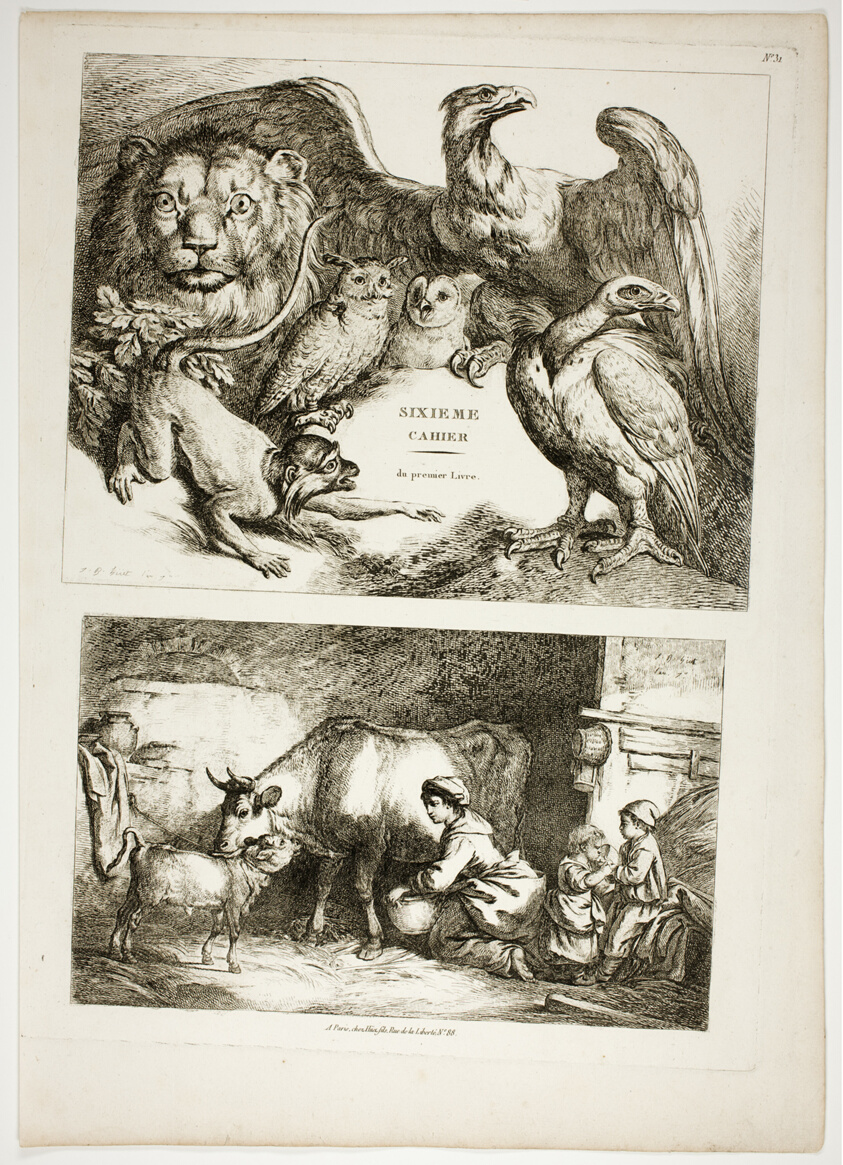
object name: Print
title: Plate 31 of 38 from Oeuvres de J. B. Huet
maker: Jean Baptiste Huet (French, 1745-1811)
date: 1796–99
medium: Etching on paper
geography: France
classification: etching; print; prints and drawing